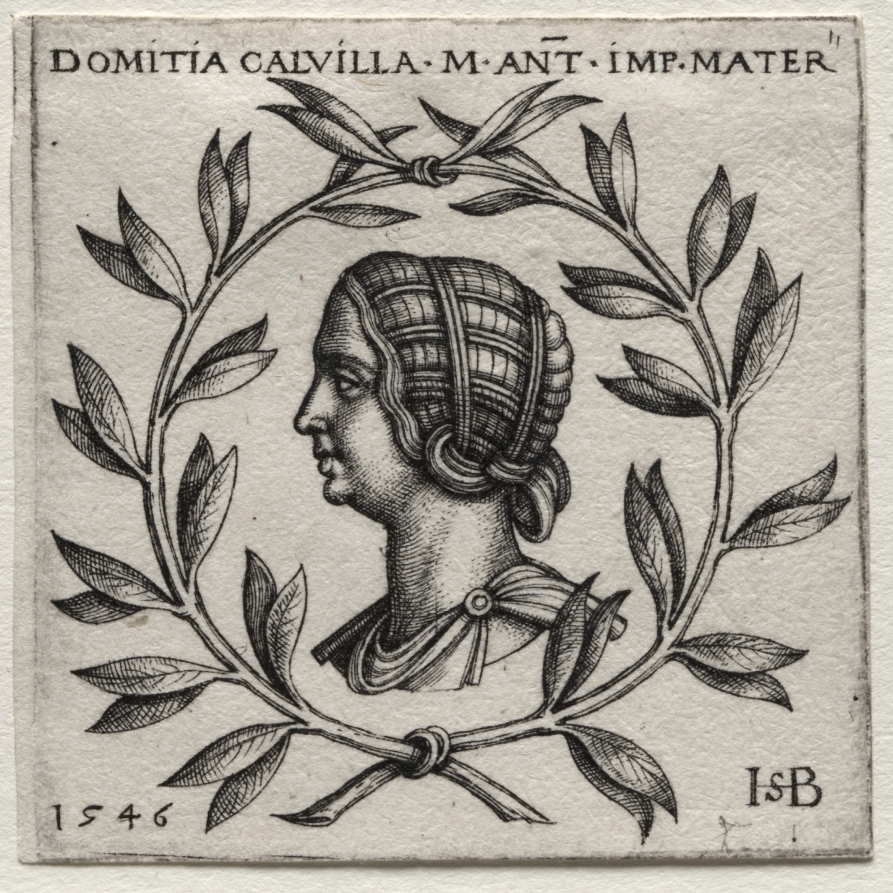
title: Domitia Calvilla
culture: Germany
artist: Hans Sebald Beham (German, 1500–1550)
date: 1546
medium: engraving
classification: Print